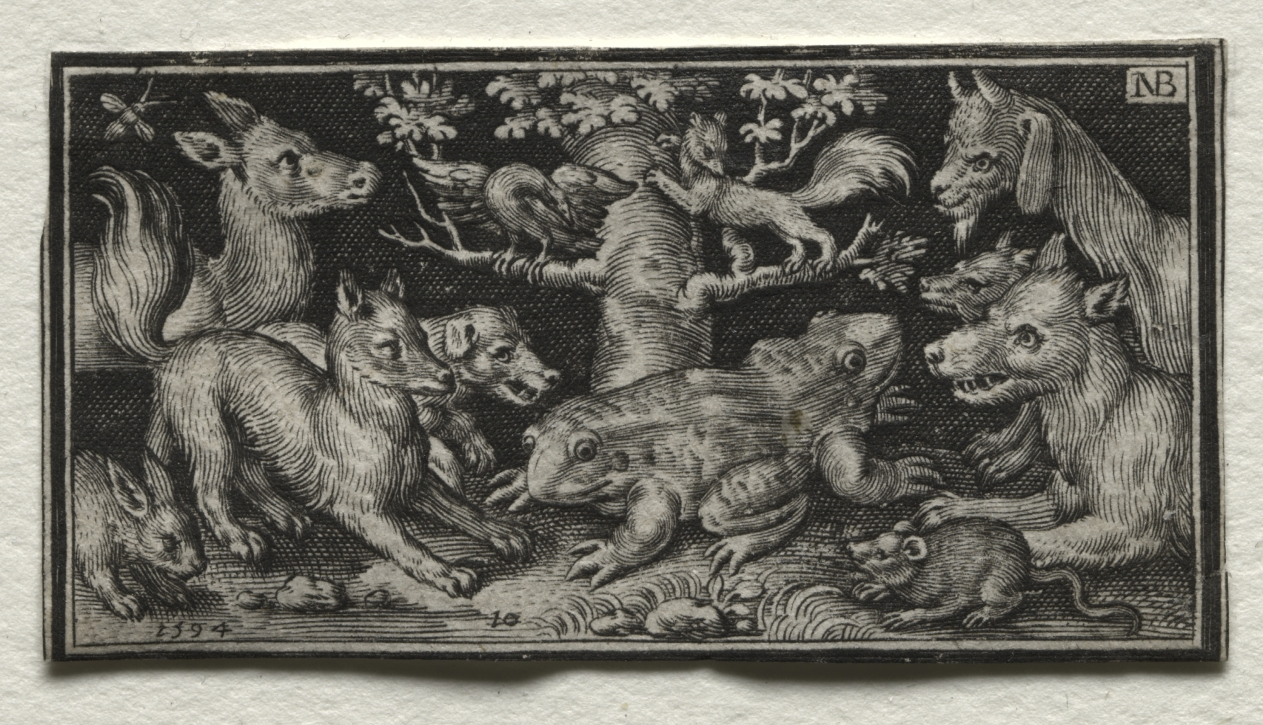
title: Two-headed Frog surrounded by Animals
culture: Netherlands, 16th century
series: Fighting Chimeras and Scenes to Aesop's Fables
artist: Nicolaes de Bruyn (Netherlandish, 1571–1656)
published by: A. van Londerseel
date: 1594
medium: engraving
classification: Print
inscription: upper right, in plate: NB ; lower left, in plate: 1594 ; VERSO, center, in graphite: 9[circled] FPO ; lower left, in graphite: B4241 ; lower right, in graphite: 6264/130